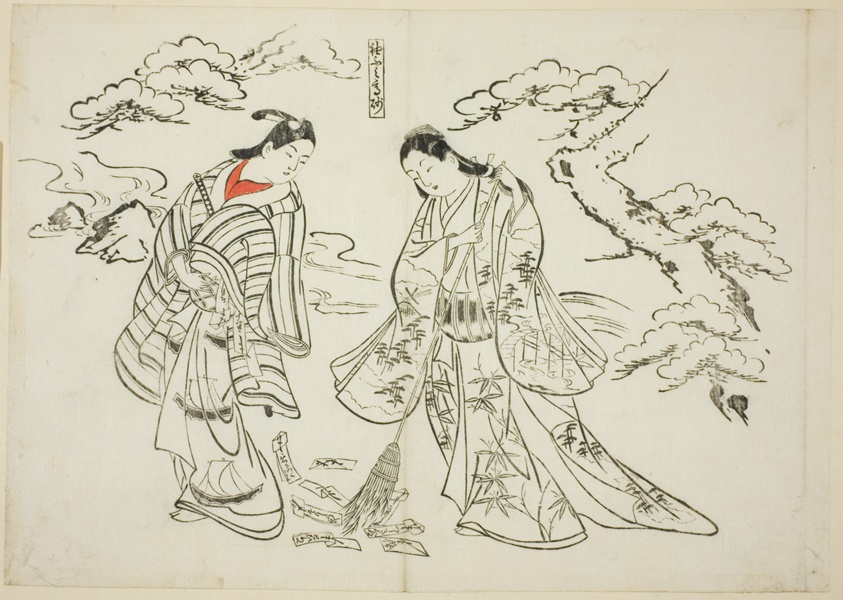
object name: Print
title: Sleeve-Letter Takasago (Sodefumi Takasago), no. 2 from a series of 12 prints depicting parodies of plays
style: Japanese (culture or style)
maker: Okumura Masanobu (Japanese, 1686-1764)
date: c. 1716/35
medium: Hand-colored woodblock print; oban, sumizuri-e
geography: Japan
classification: woodblock print; print; asian art